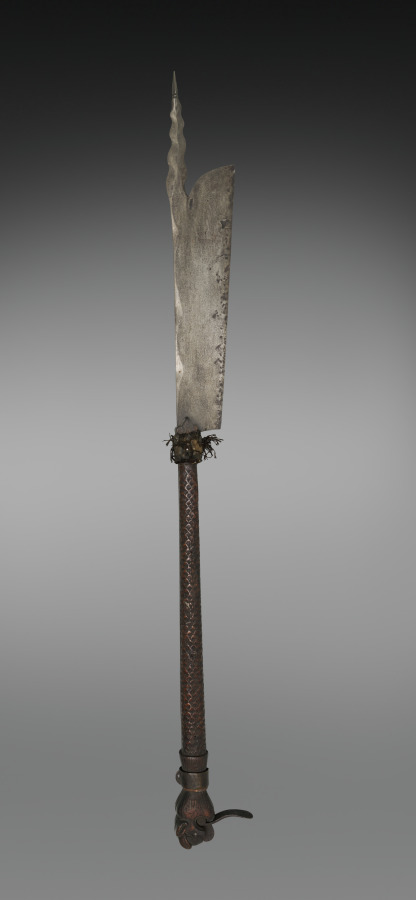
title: Glaive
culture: Italy, 15th century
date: 1400s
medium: plain steel blade, carved wooden haft with protruding tongue of steel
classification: Arms and Armor